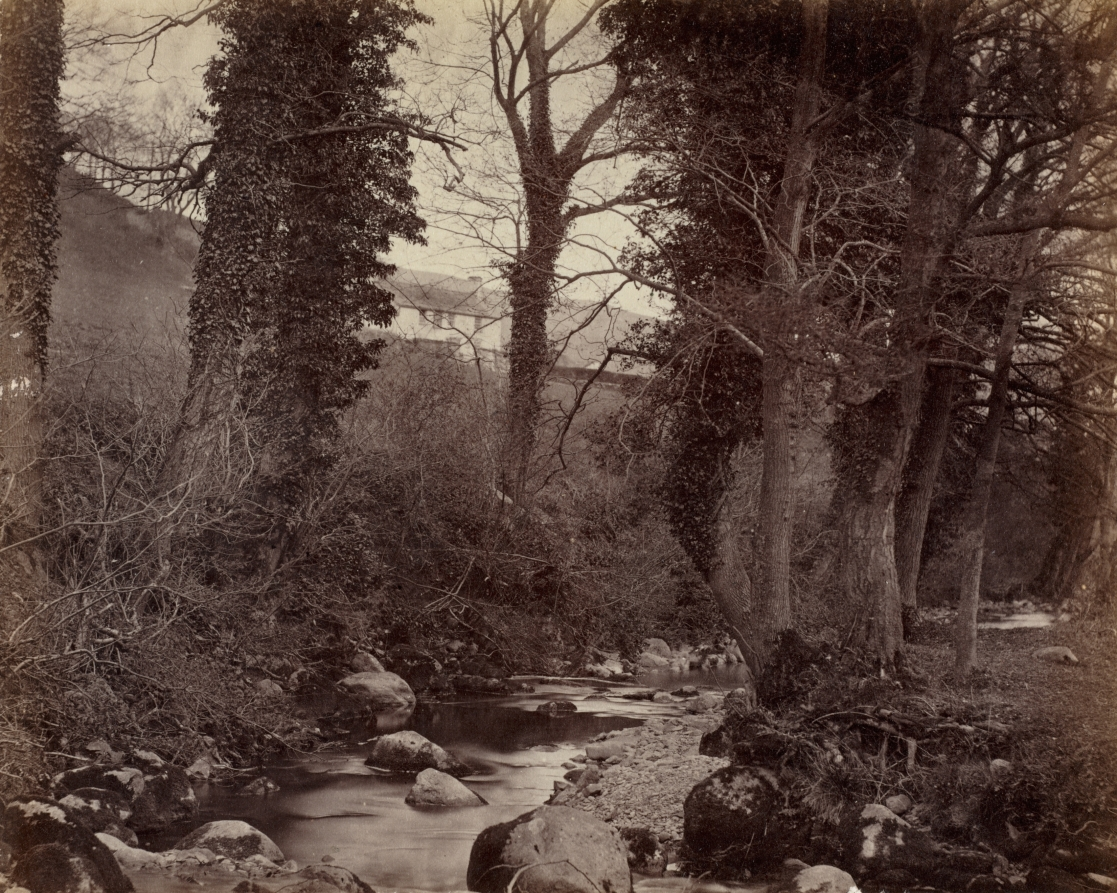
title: Untitled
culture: England, 19th century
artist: John Lloyd (British, 1865)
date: c. 1859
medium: albumen print from wet collodion negative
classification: Photograph